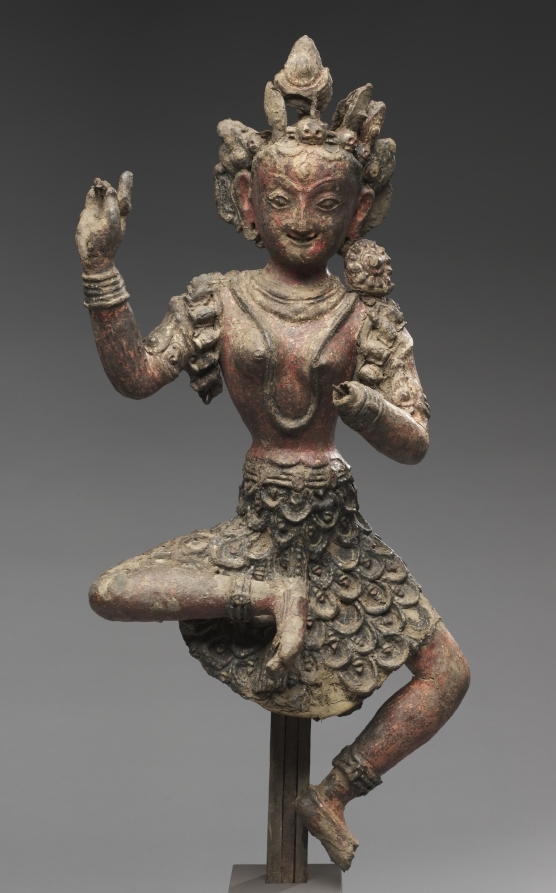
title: Goddess Vajravarahi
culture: Nepal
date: c. 1040–c. 1310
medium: unbaked clay and pigment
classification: Sculpture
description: This powerful red goddess dances vigorously and raises one hand that would have held a flaying knife, while the other once held a skull cup. Her bone skirt and garland of freshly severed heads complement the skulls that adorn her crown. Her eyes bulge, her brow furrows, and she bares her teeth. These attributes communicate her power to assist her followers in overcoming passions, ignorance, and fear. This is one of the earliest surviving images made of unbaked clay, using an iron armature and rope strings to support the ornament.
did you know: The wooden post is an original and would have been set into a sculpted corpse.